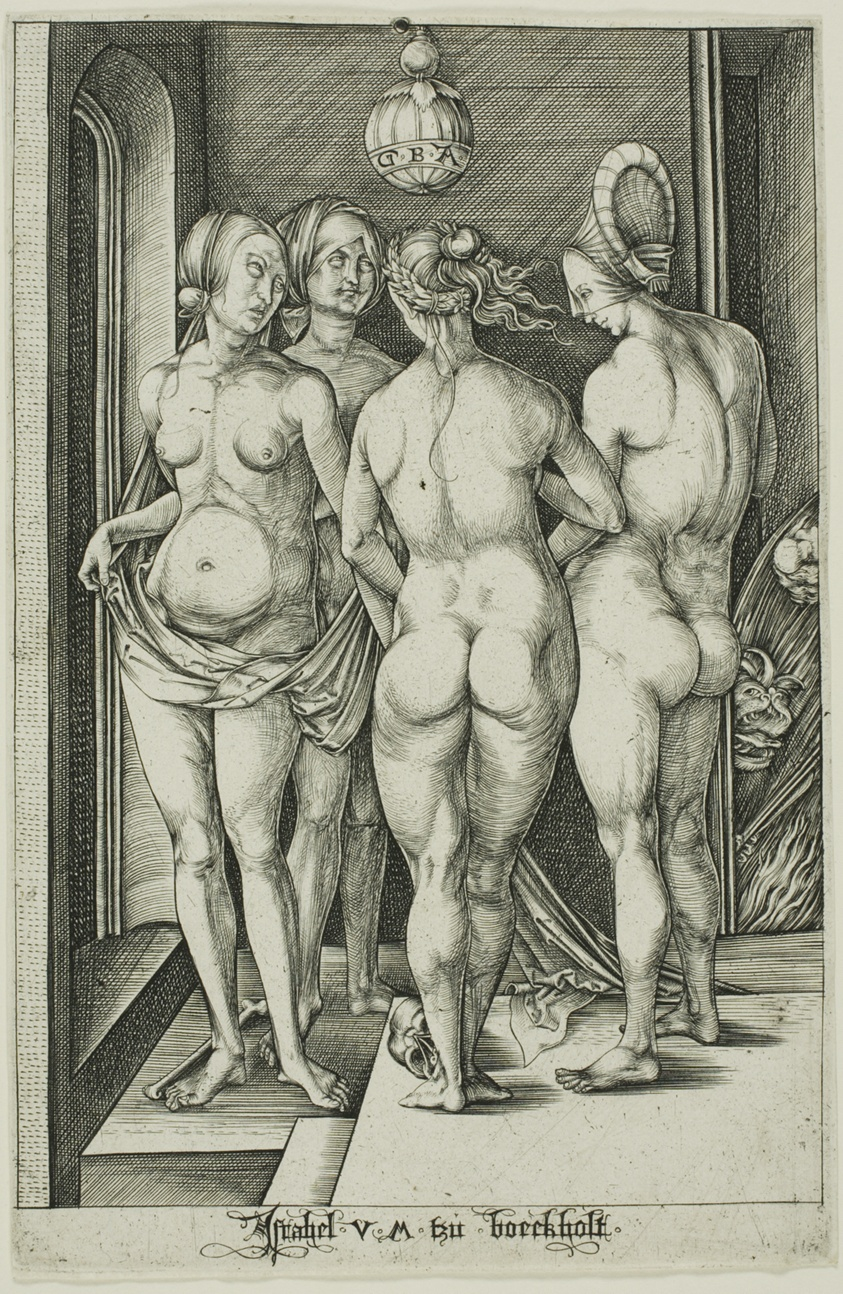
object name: Print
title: The Four Witches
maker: Israhel van Meckenem the Younger; German, c. 1440/45-1503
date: after 1497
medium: Engraving in black on ivory laid paper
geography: Germany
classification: engraving; print; prints and drawing